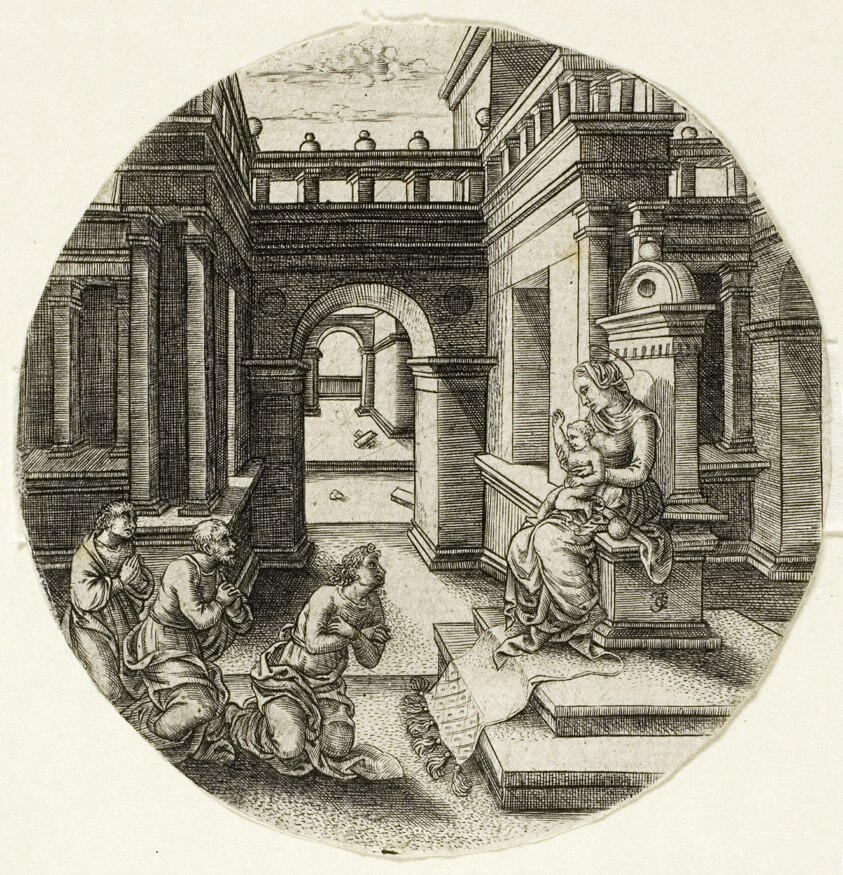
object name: Print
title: The Virgin Seated on an Altar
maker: Jean de Gourmont (French, 1506-1551)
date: 1520/40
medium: Engraving in black on ivory laid paper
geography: France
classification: engraving; print; prints and drawing